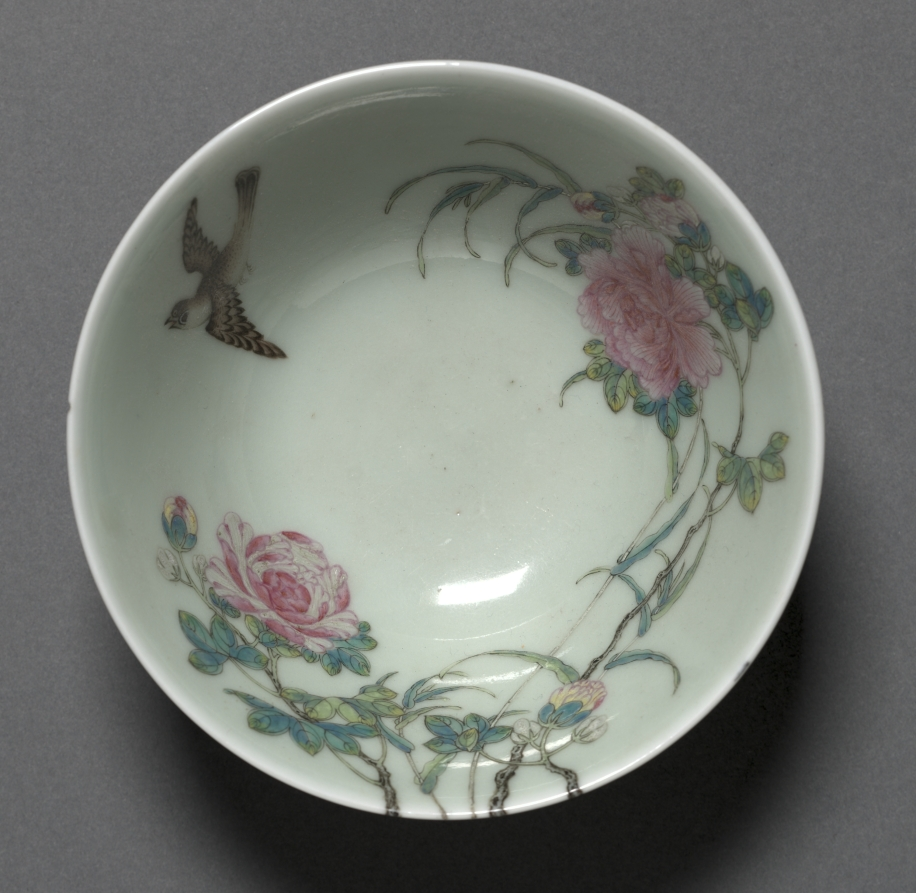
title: Bowl with Bamboo, Tree Peony, and Swallow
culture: China, Jiangxi province, Jingdezhen kilns, Qing dynasty (1644-1911), Yongzheng mark and reign (1723-35)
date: 1723–35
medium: porcelain with famille rose overglaze enamel decoration and celadon glaze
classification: Ceramic